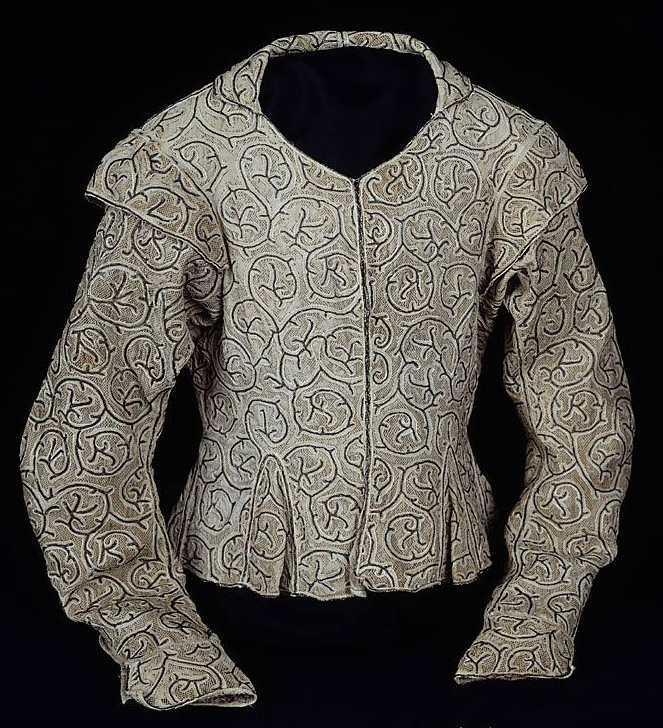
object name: Textile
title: Bodice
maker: England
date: 16th century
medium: Linen, plain weave; embroidered with silk, silvered-metal-strip-wrapped fiber, and linen in chain and seed stitches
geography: England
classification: textile; needlework (visual works); costume; dress (garment); clothing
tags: fashion